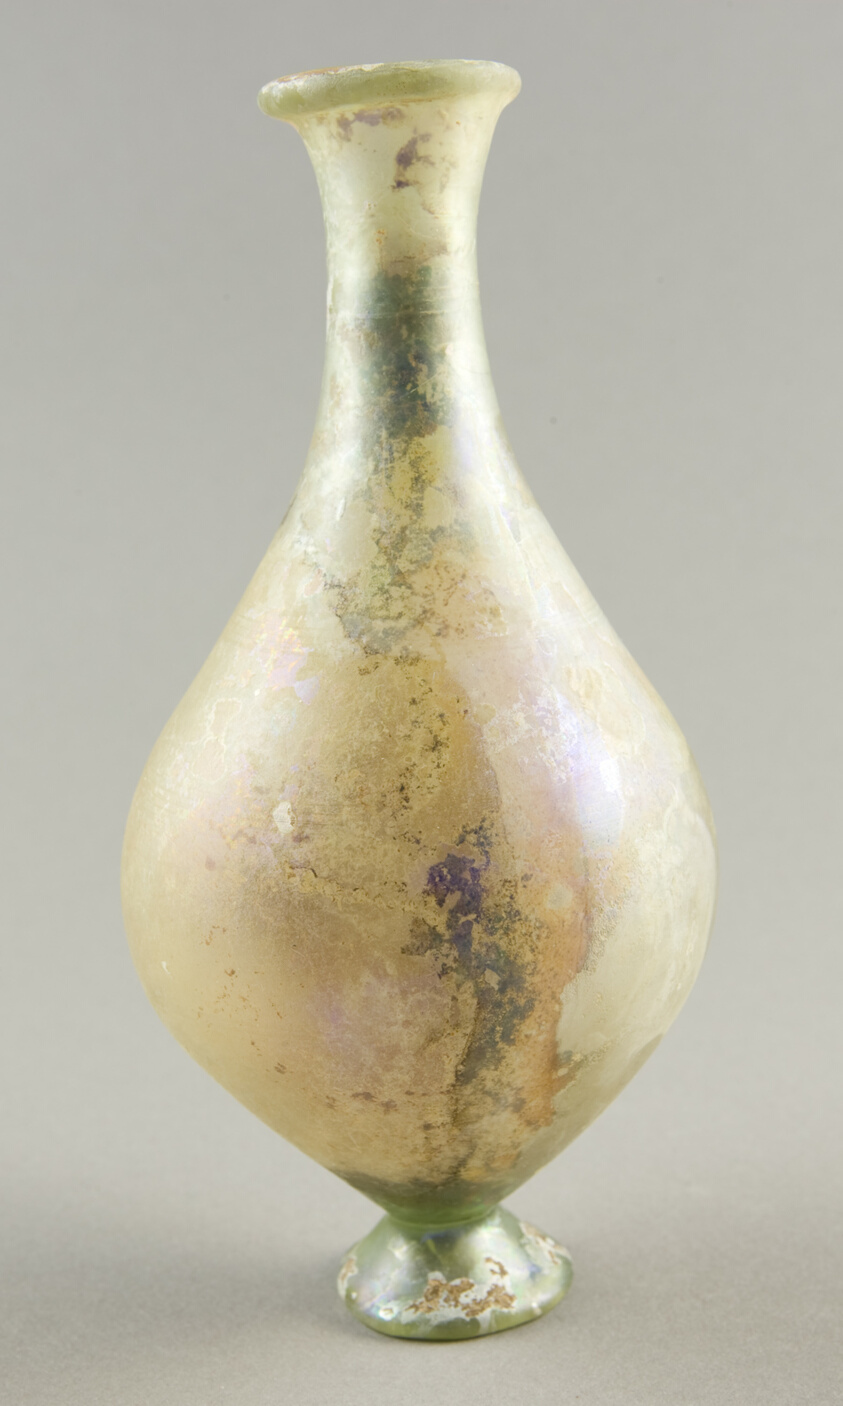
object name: Vessel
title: Bottle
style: syrian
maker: Roman, Levant or Syria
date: 1st-3rd century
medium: Glass, blown technique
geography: Syria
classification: bottle; glass; vessel; ancient art